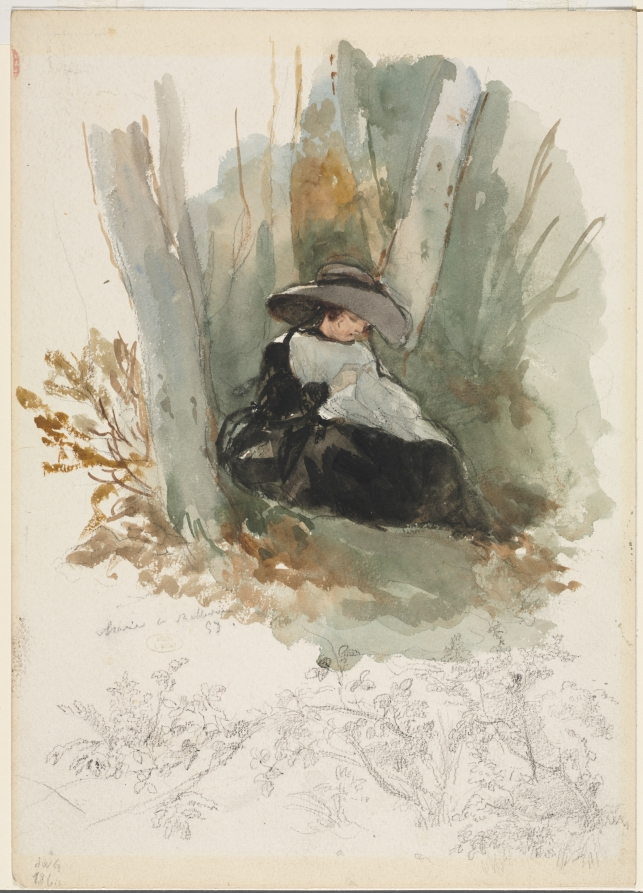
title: Marie à Bellevue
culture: Belgium, 19th century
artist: Louis-Joseph Gallait (Belgian, 1810–1887)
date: 1858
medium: watercolor and graphite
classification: Drawing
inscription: inscribed in graphite, left: Marie à Bellevue (recto) Bears inscription in black ink on verso: "Par / Louis Gallait 1810-1887 / Marie à Bellevue en 1858 / sa / fille qui épousa Charles Fouder [sic]"